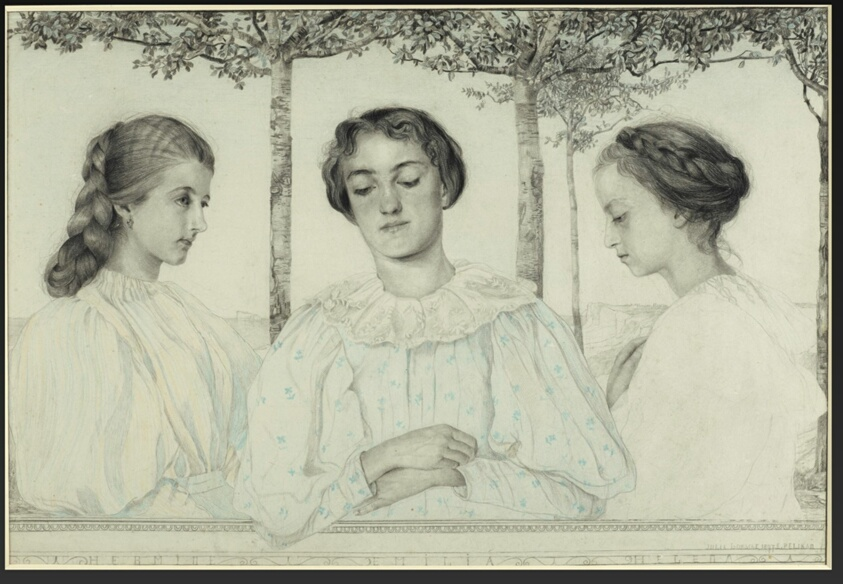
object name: Drawing and Watercolor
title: A Triple Portrait of Hermine, Emilia, and Helena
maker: Emilie Mediz-Pelikan (Austrian, 1861-1908)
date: 1897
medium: Colored pencil on blue wove paper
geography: Austria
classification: drawing; prints and drawing; paper; colored pencil